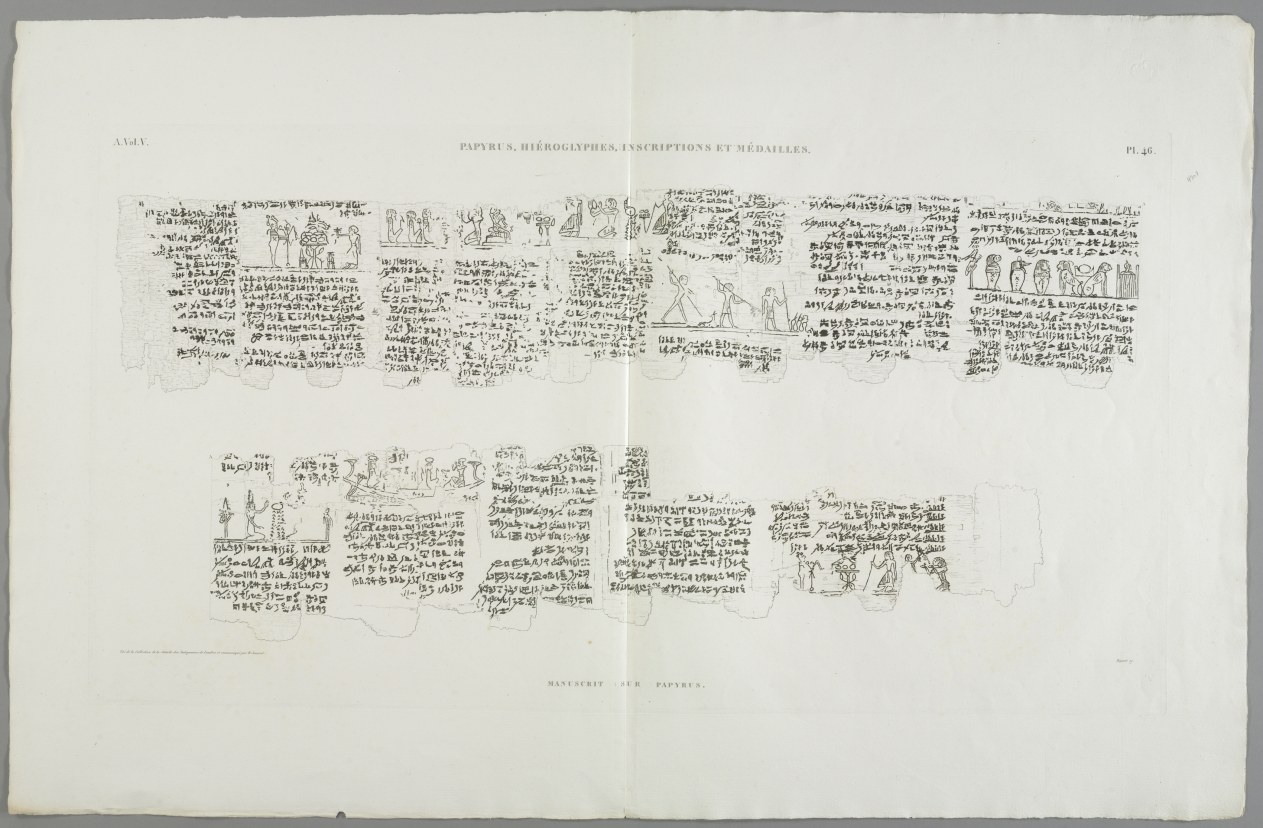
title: Description of Egypt: Thebes. Medynet-abou, Vol V, pl. 46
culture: France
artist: Baptiste Bigant (French)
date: c. 1822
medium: etching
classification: Print